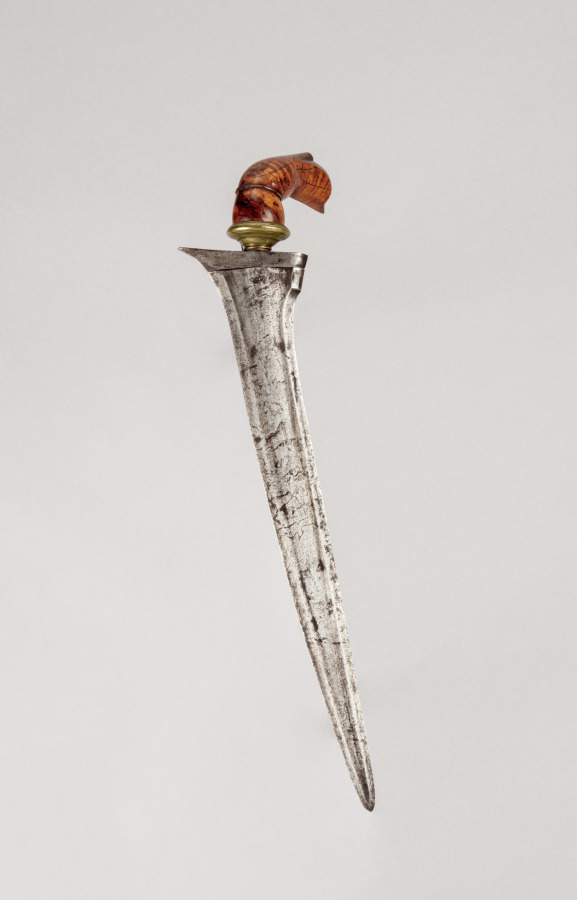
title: Sword (Kris)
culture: Java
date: 1800s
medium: iron with wooden handle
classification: Arms and Armor